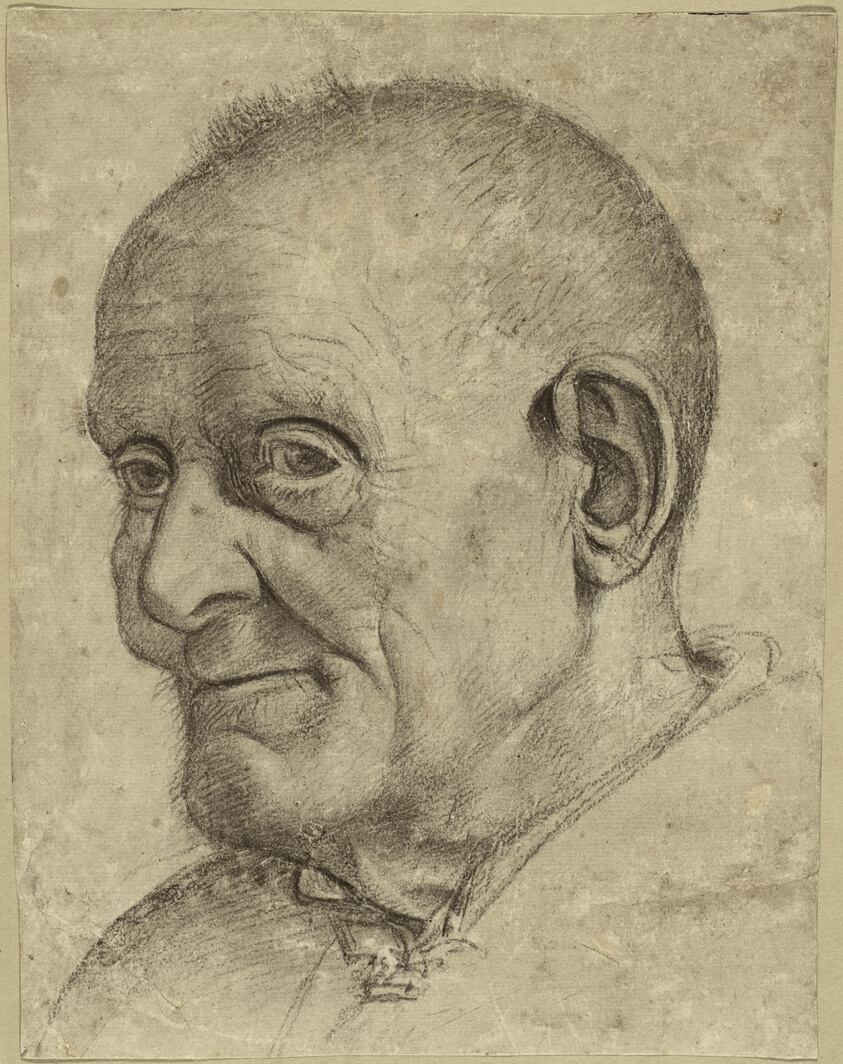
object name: Drawing and Watercolor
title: Portrait of an Old Man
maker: Attributed to Francesco Bonsignori; Italian, c. 1460–1519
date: late fifteenth century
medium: Charcoal, with wet brush and stumping, on tan laid paper prepared with a gray ground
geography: Italy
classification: drawings (visual works); charcoal; paper; prints and drawing